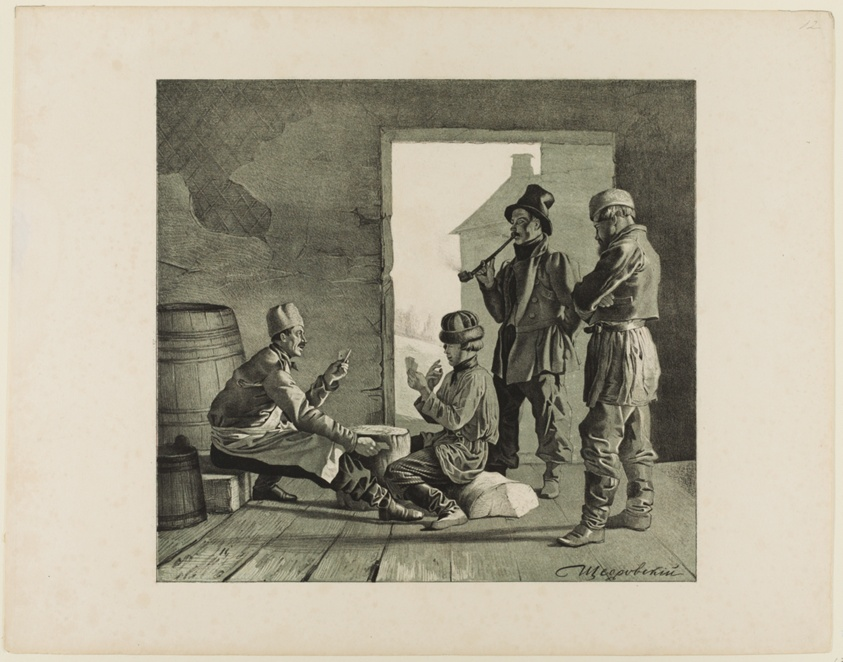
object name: Print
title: Scenes from Russian Folk Life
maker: Ignatii Stepanovich Shchedrovskii (Russian, 1815-1870)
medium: Color lithograph on paper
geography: Russia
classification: lithograph; print; prints and drawing